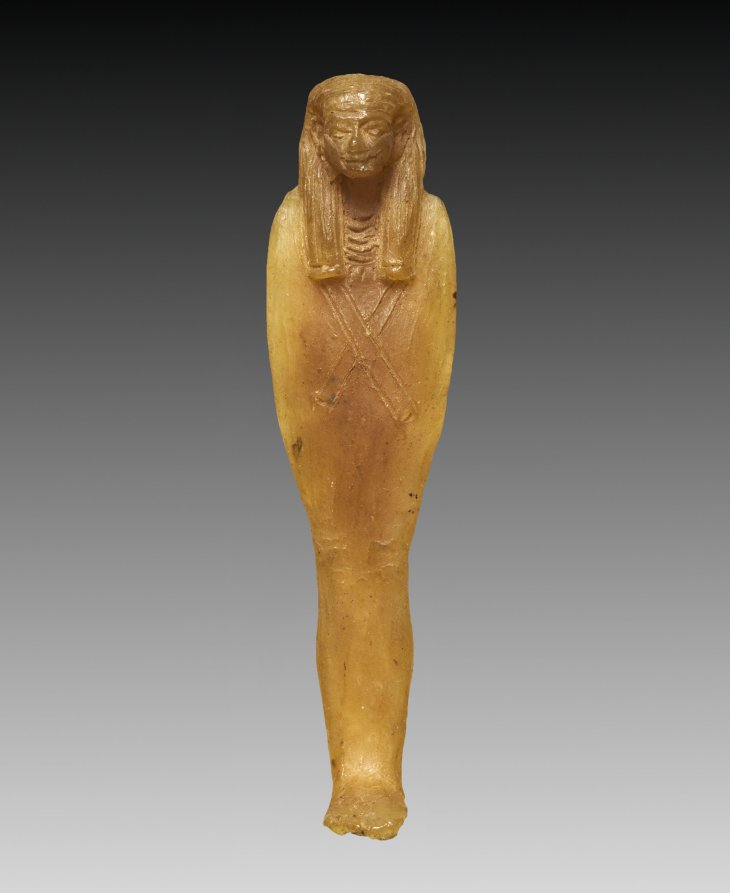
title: Son of Horus: Imsety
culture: Egypt, Third Intermediate (1069–715 BCE), Dynasties 21–22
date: 1000–900 BCE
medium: honey-colored wax with dark amber varnish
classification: Funerary Equipment